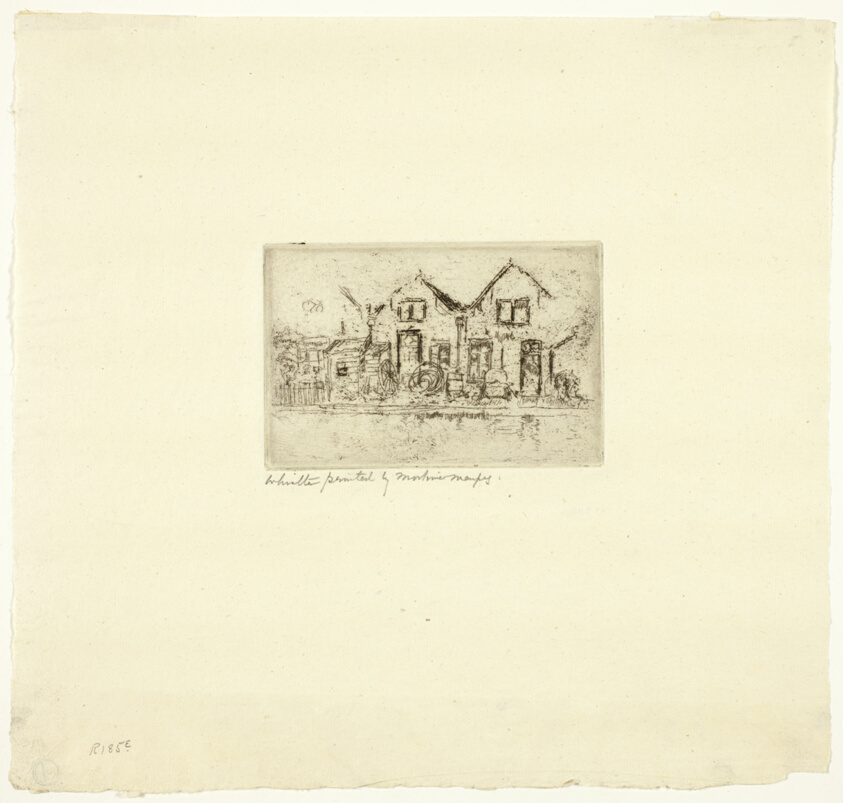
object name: Print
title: The Little Wheelwright's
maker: James McNeill Whistler (American, 1834-1903)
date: 1886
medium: Etching with foul biting and plate tone in black on cream laid paper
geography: United States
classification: etching; foul biting; print; prints and drawing; paper